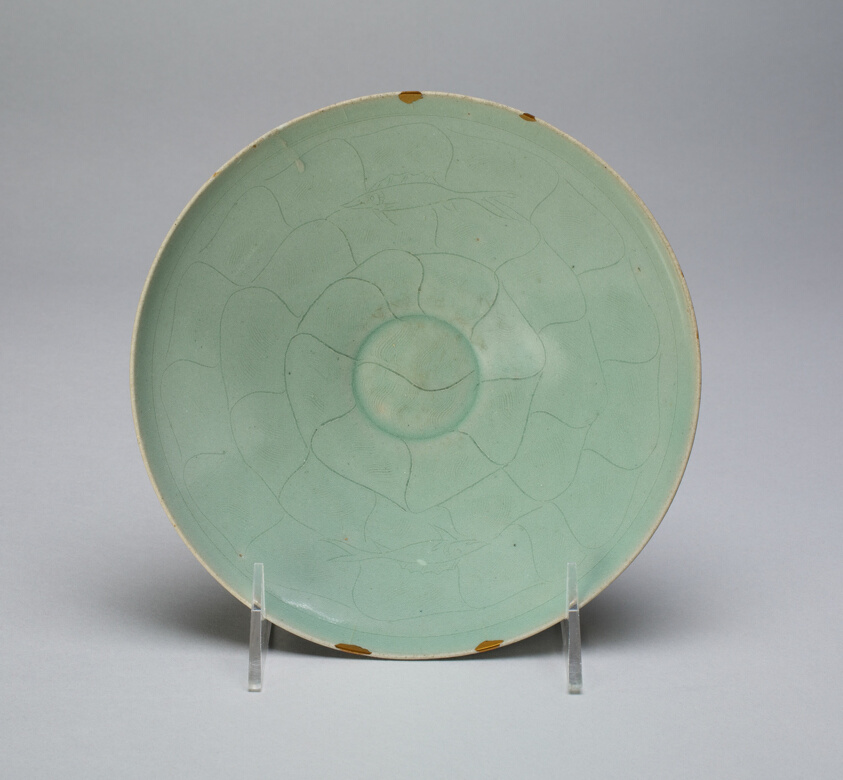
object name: Vessel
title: Bowl with Radiating Petals and Two Fish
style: Korean (culture or style)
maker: Korea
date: Goryeo dynasty (918–1392)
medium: Celadon-glazed stoneware with underglaze incised decoration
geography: Korea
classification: bowl; dish (vessel); asian art; ceramics; vessel